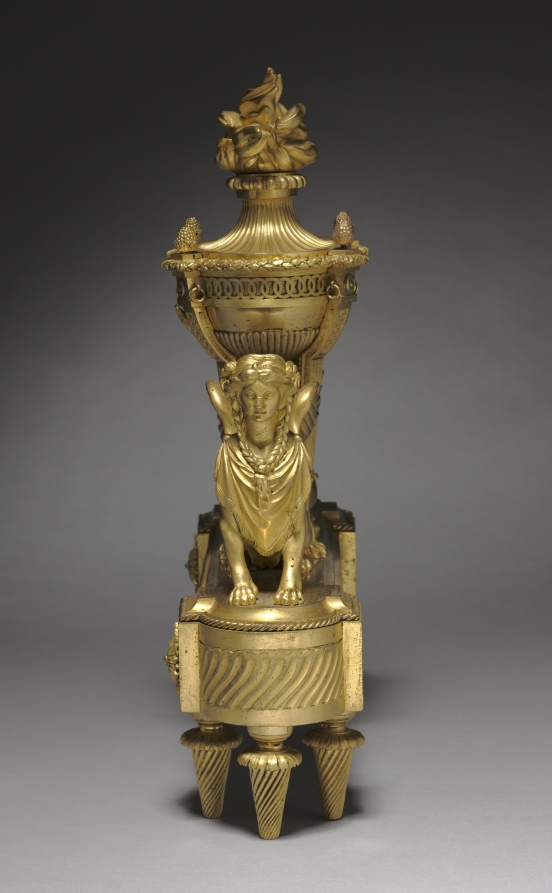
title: Firedog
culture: France, 18th century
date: c. 1785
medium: gilt bronze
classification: Furniture and woodwork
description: Although Louis Jean Desprez’s design was largely inspired by tombs in southern Italy, he added sphinxes in his print Tomb with Sphinx due to his fascination with ancient Egypt. Ancient Egyptians saw the sphinx, a half-human, half-lion mythological creature, as a protector of tombs and temples. The pair of andirons, decorative supports for a hearth’s firewood, alongside Tomb with Sphinx, highlight the growing interest in Egyptomania during the 1700s. Interestingly, the andirons portray ancient Greek and Roman interpretations of the sphinx. Most Europeans learned of ancient Egypt by studying Egyptomania in ancient Roman and Greek art and architecture or Egyptian antiquities brought over by the Romans.